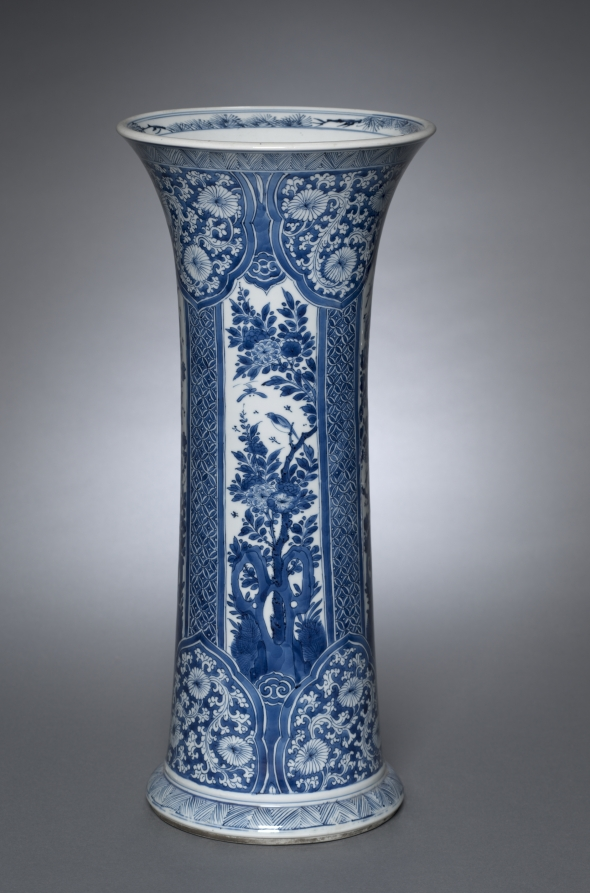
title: Vase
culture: China, Jiangxi province, Jingdezhen kilns, Qing dynasty (1644–1911), Kangxi reign (1662–1722)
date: 1662–1722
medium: porcelain with underglaze blue decoration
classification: Ceramic